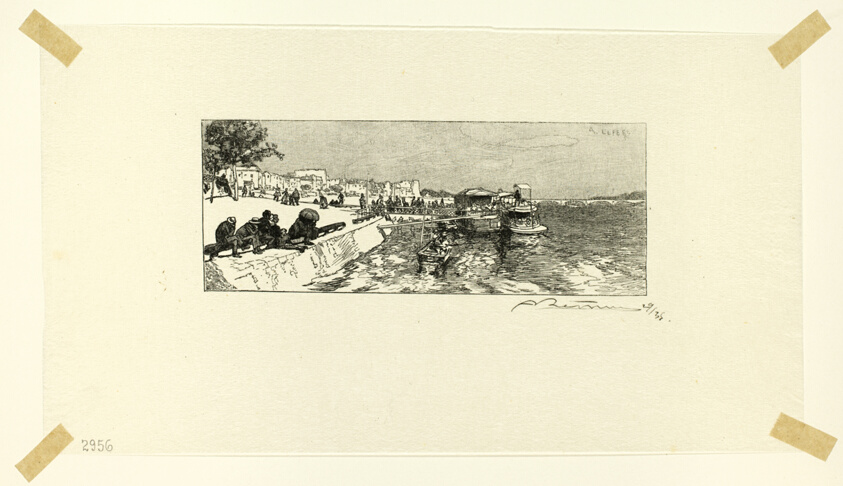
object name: Print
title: Bercy Wharf, plate two from Le Long de la Seine et des Boulevards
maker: Louis Auguste Lepère (French, 1849-1918); published by A. Desmoulins (French, active c. 1908-1910)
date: 1890, published 1910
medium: Wood engraving in black on cream Japanese tissue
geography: France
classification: wood engraving; print; prints and drawing